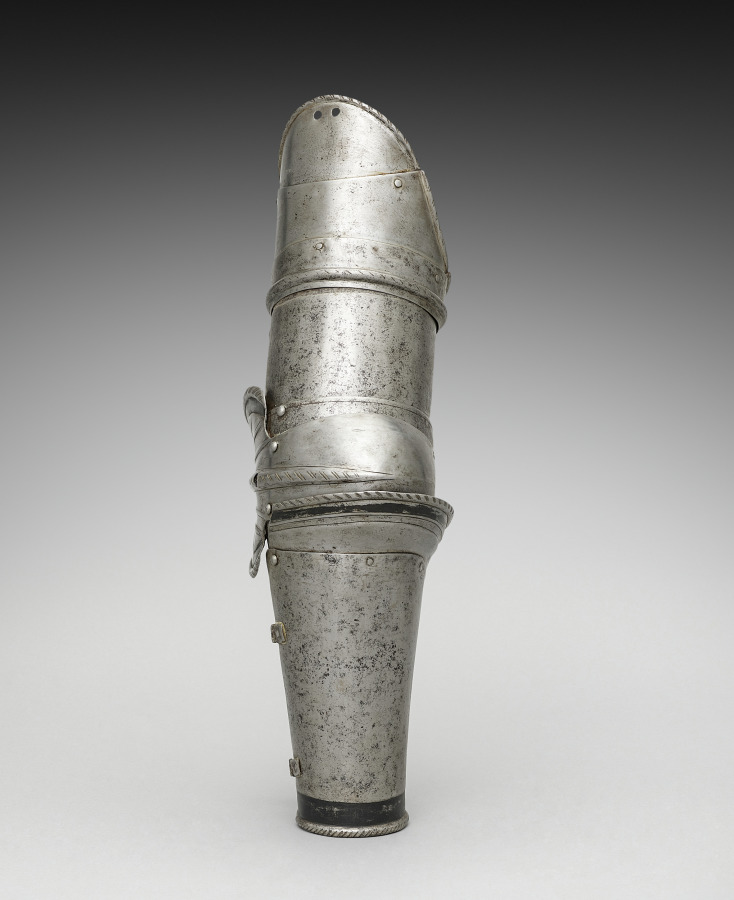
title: Left Vambrace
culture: Germany, 19th century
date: 1801–1900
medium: steel with black paint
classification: Arms and Armor